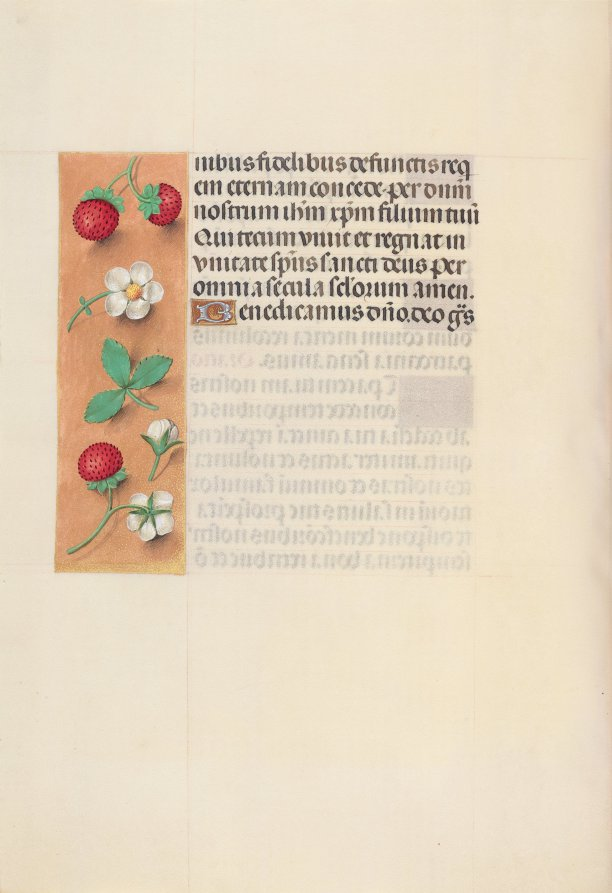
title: Hours of Queen Isabella the Catholic, Queen of Spain: Fol. 125v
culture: Flanders, Ghent and Bruges, late 15th century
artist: Master of the First Prayerbook of Maximillian (Flemish, c. 1444–1519)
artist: and Associates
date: c. 1500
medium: ink, tempera, and gold on vellum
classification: Bound Volume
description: This manuscript was illuminated by a circle of at least five highly organized manuscript painters active in the Flemish cities of Ghent and Bruges. The principal illuminator was Alexander Bening, who painted the majority of the book's miniatures. Manuscripts produced by this circle of artists are renowned for the decoration of their borders, which typically feature a rich variety of realistically-painted flowers, birds, and butterflies. This prayer book, called a book of hours, was intended not for a cleric, but for the private devotions of a lay person-in this case, Isabella the Catholic, Queen of Spain (1451-1504). Isabella's coat of arms embellishes the book's frontispiece. It is unlikely that the book was commissioned by the Queen herself; rather, she probably received it as a diplomatic gift from someone courting her patronage, perhaps Cardinal Francisco Jimenez de Cisneros. A Franciscan friar, Jimenez was dependent upon Isabella for his advancement, first to the post of Queen's confessor in 1492, and then to Archbishop of Toledo in 1495.